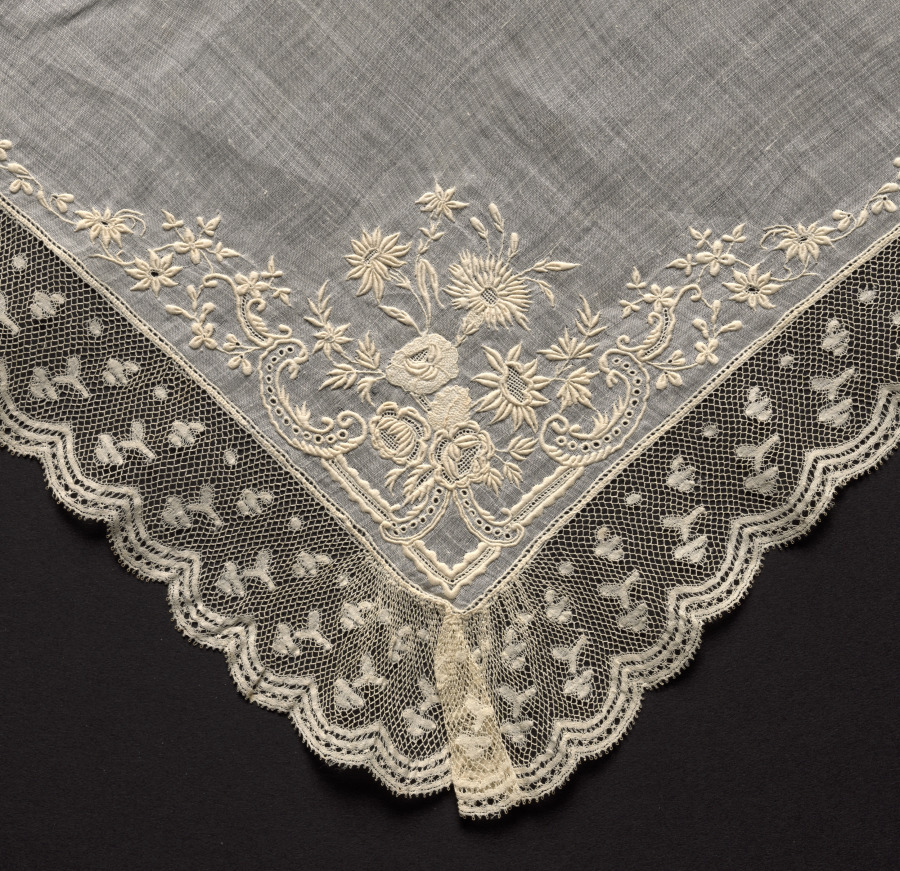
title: Lace Handkerchief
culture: Flanders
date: 1700s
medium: plain weave linen center with bobbin lace (Valenciennes lace) edging and embroidery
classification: Embroidery